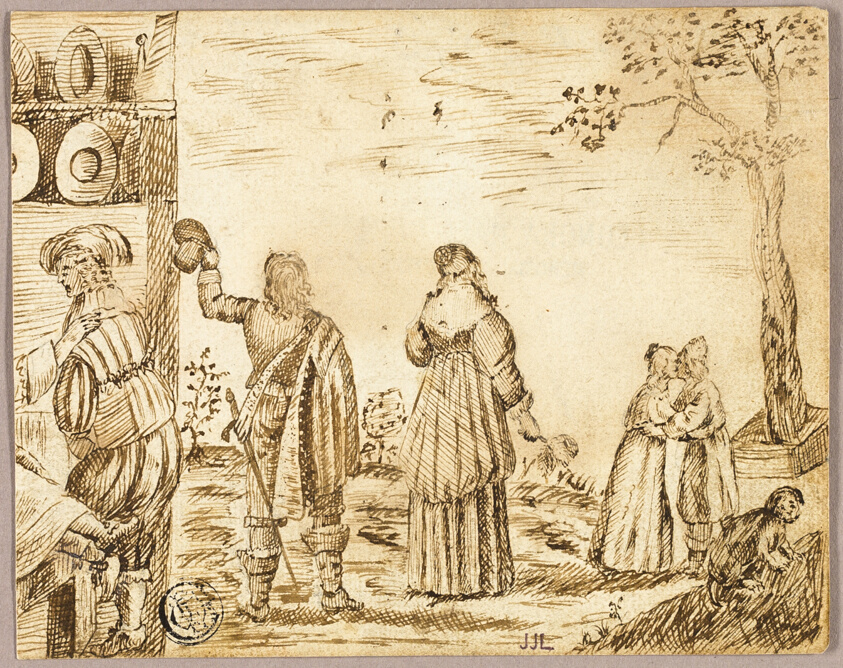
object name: Drawing and Watercolor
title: Cavaliers Taking Leave of Their Sweethearts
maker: David Balthasar Wagner (German, 17th century)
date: 1662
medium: Pen and brown ink on tan laid paper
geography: Germany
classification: pen and ink drawings; drawings (visual works); prints and drawing